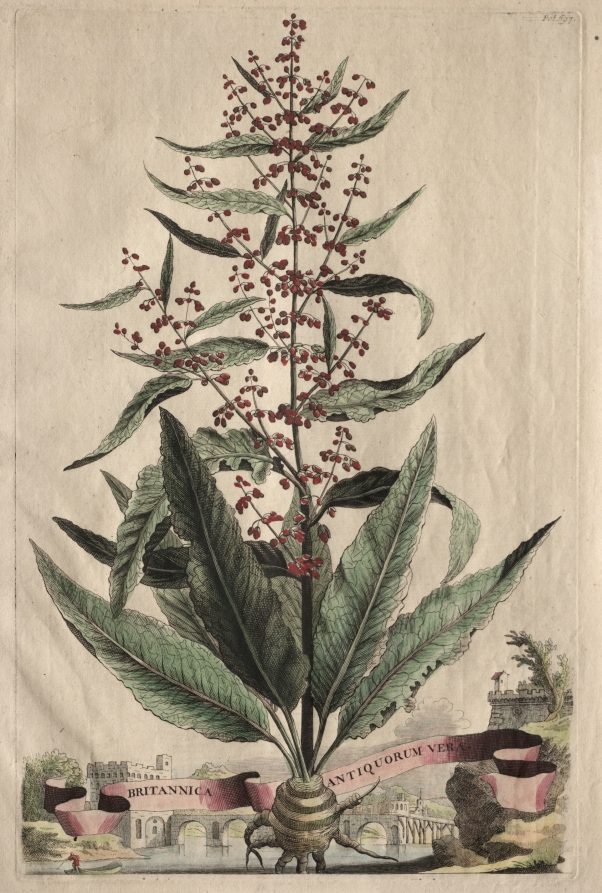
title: Phytographia Curiosa: Britannica Antiquorum Vera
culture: Netherlands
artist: Abraham Munting (Dutch, 1626–1683)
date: c. 1651–83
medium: etching, hand colored with watercolor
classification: Print